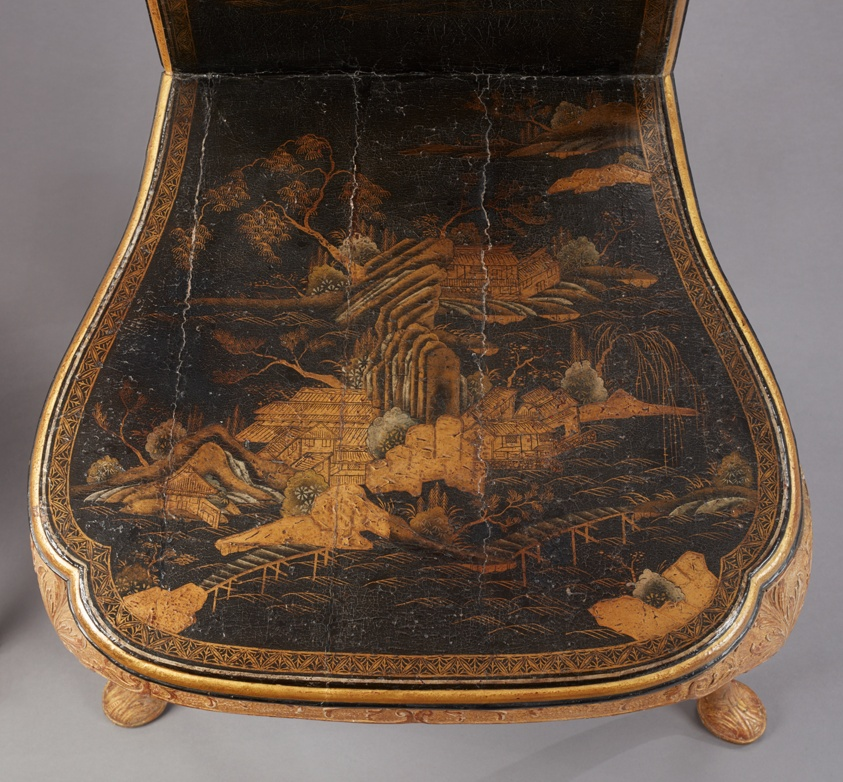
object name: Furniture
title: Pair of Hall Chairs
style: Baroque, chinoiserie, georgian, 18th Century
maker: China (lacquer back and seat panels) and England (frame)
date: 1720-30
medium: Frames: gilt gesso on beechwood; Backs and seats: lacquered and gilt Chinese softwood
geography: England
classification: chair; furniture; seating; european decorative arts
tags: landscapes, rocks